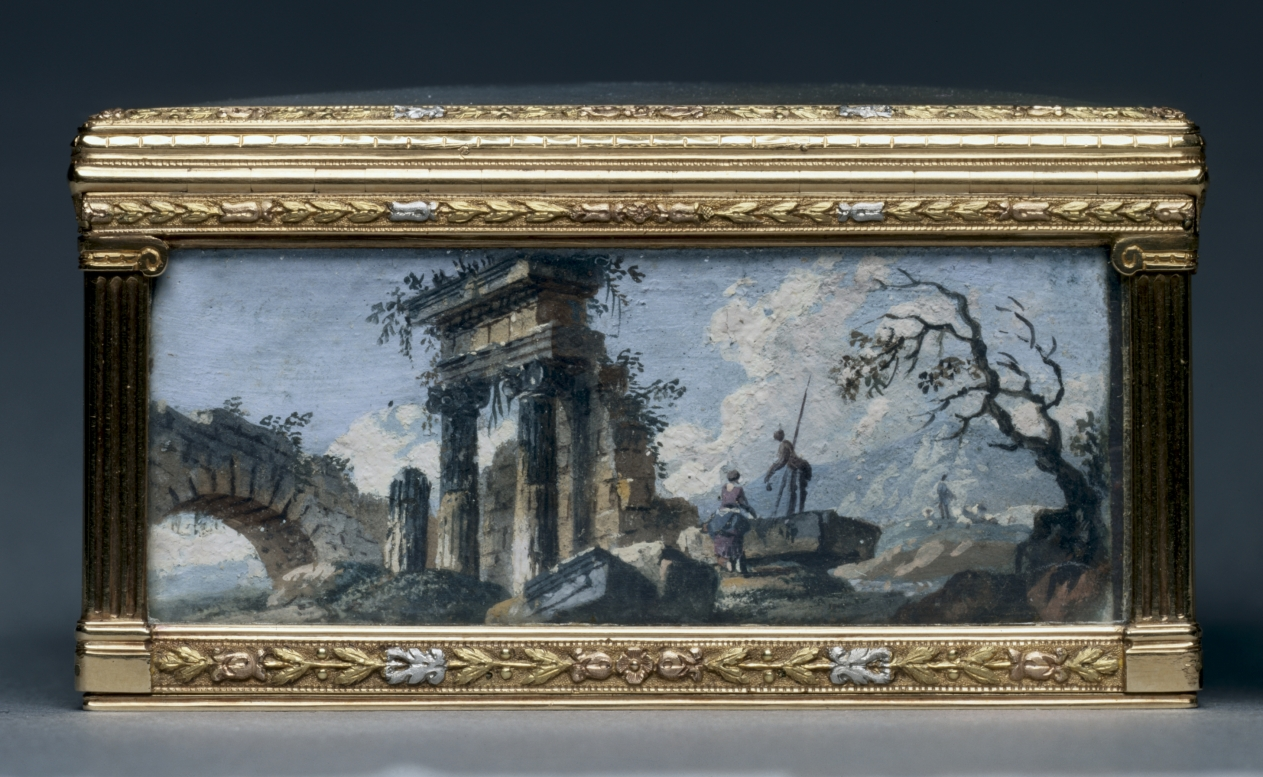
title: Rectangular Box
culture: France, 19th century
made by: Alexandre Leferre (French)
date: c. 1840–1850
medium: gouache miniatures mounted on gold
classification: Miscellaneous